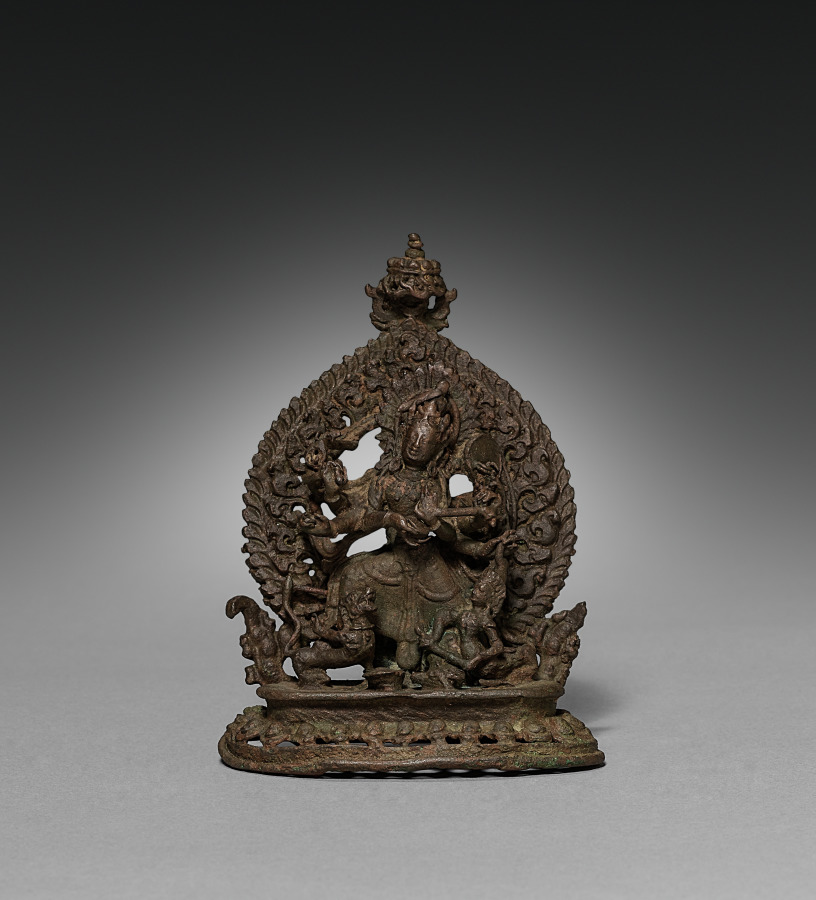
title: Durga Slaying the Demon Buffalo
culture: Nepal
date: 1500s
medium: bronze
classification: Sculpture